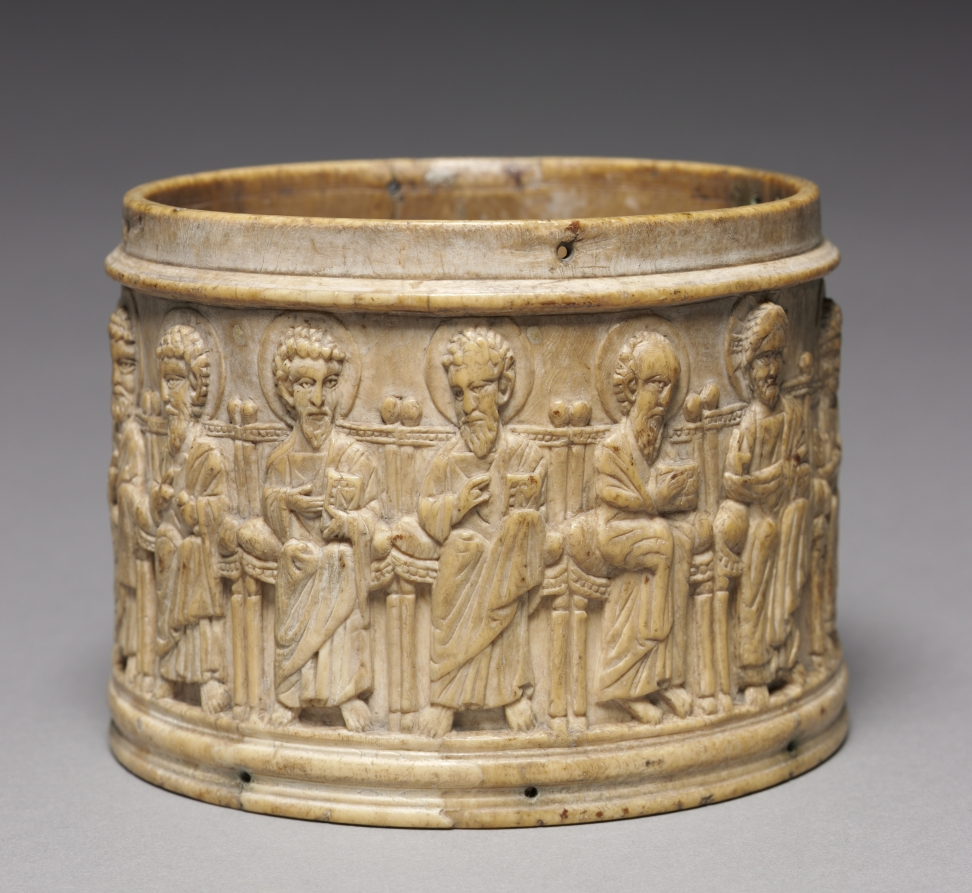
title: The "Apostles" Pyx (Box)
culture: Byzantium, Constantinople, middle Byzantine period, 10th-11th century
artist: probably by Triptych Group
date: c. 980–1010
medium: ivory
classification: Ivory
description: This pyx shows Christ as Pantokrator (Ruler of the World), the Apostles, and the Virgin as a continuous frieze of figures seated in high-backed chairs with cushions. The tapered lip of the body of the pyx was intended to dovetail into the missing lid. Because of its style, the box is thought to be from a workshop of ivory carvers called "The Triptych Group" active in Constantinople between about 950 and 1010. This is the only known pyx to survive from the Middle Byzantine period (about ad 843-1204).